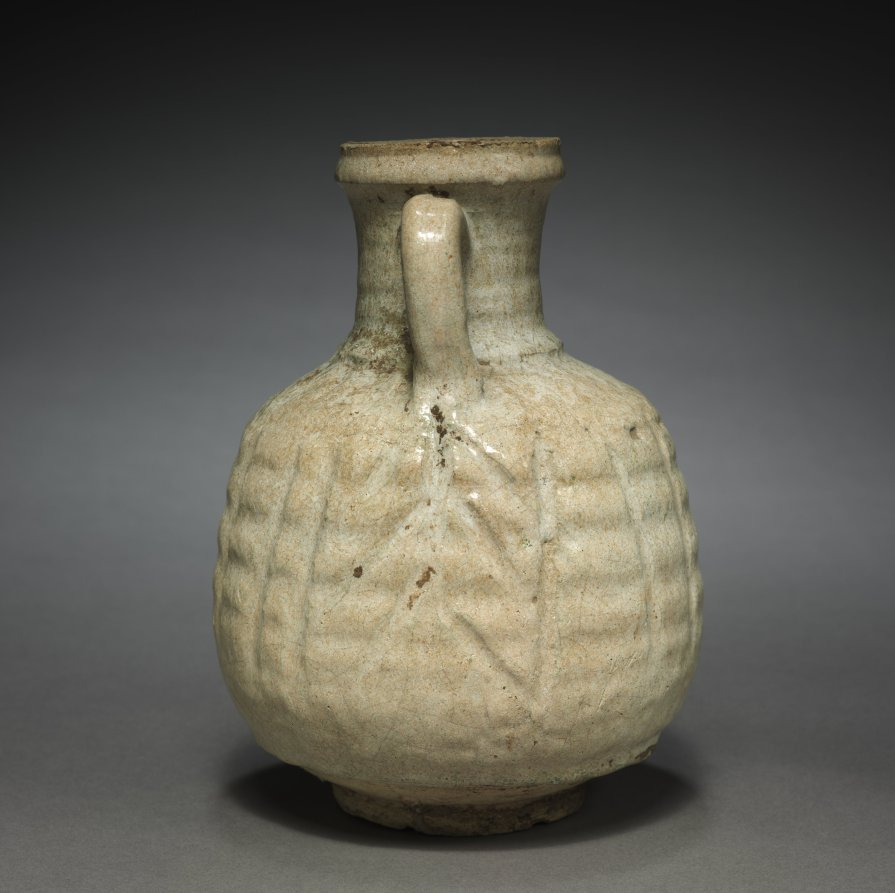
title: Vase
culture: Parthian Empire (247 BCE–224 CE)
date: 1–200 CE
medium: terracotta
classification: Ceramic